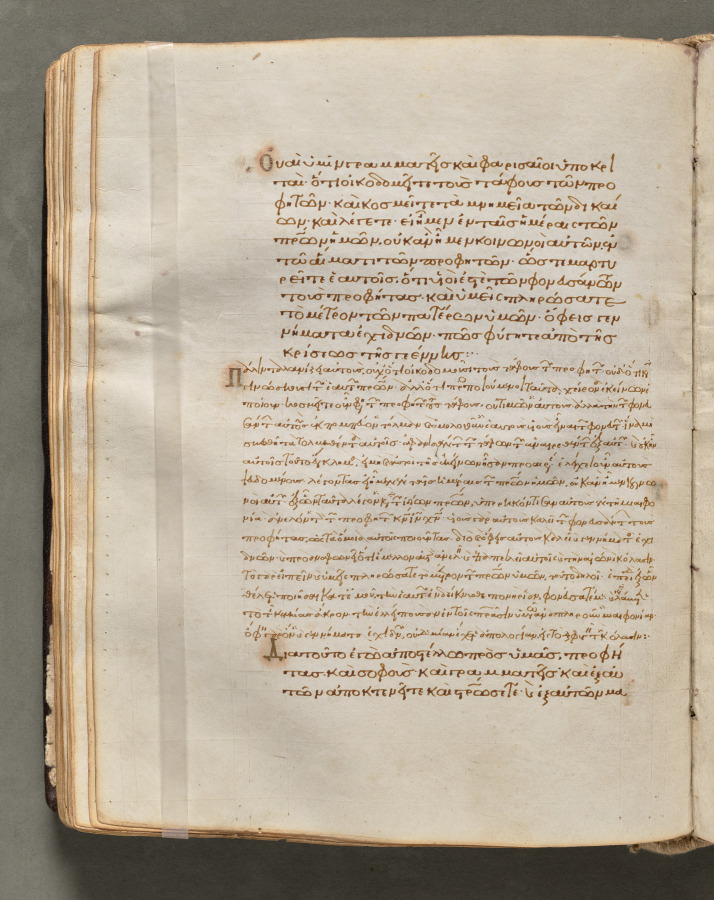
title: Text, folio 103 (verso), from a Gospel Book with Commentaries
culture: Byzantium, Constantinople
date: c. 1000–1100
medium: ink, tempera, and gold on vellum; leather binding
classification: Bound Volume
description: Each of the four gospels in this book opens on a page with brilliantly illuminated borders depicting the author of the text as well as birds-principally peacocks, symbols of the immortality of the soul-and fountains, representing the fountain of life and the salvation of the soul. This volume consists of 428 leaves with texts in Greek. Its level of sophistication suggests that it was probably written and decorated in a monastery in Constantinople.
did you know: Gospel Books were carried in procession through Byzantine churches.